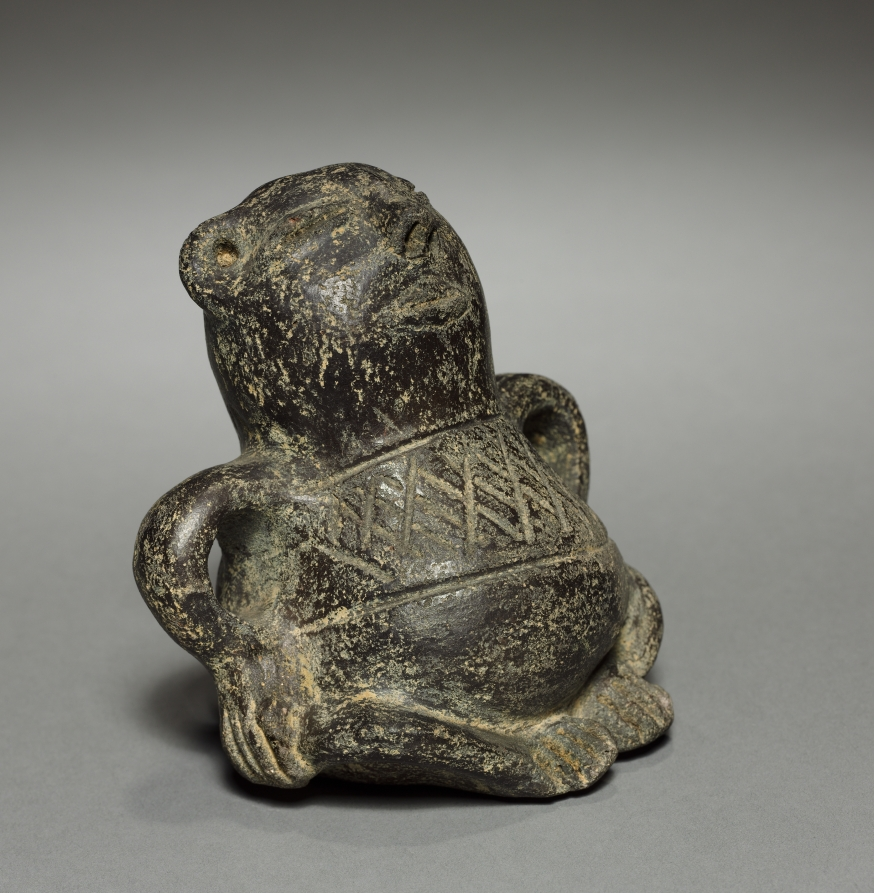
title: Seated Figure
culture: Colombia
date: before 1921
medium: pottery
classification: Ceramic